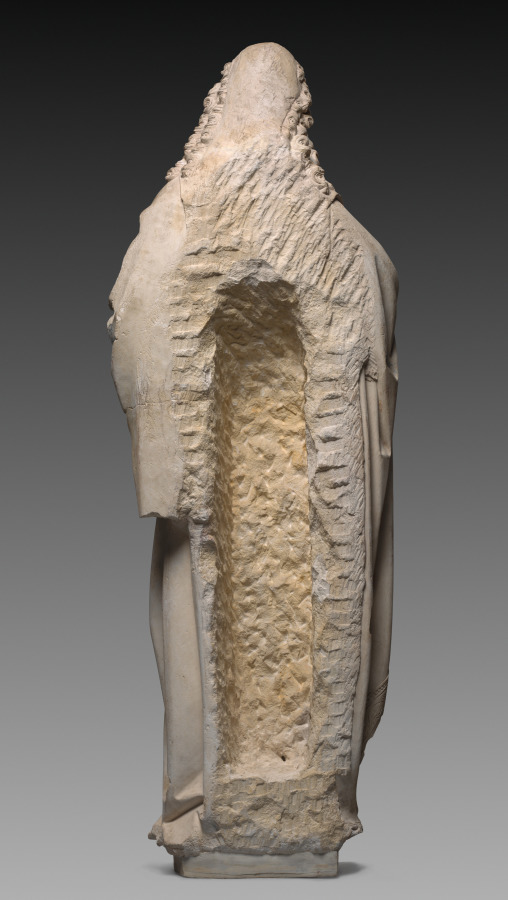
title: Saint John the Baptist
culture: French, Lorraine, Nancy or Bar-le-Duc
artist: attributed to Jan Crocq (Netherlandish, act. 1486–1510)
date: c. 1500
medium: Tonnerre limestone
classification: Sculpture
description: John the Baptist was one of the most beloved and widely venerated saints of the Middle Ages. He is depicted here wearing his traditional camel hair fleece beneath a luxuriant outer mantle. The sculpture is attributed to Jan Crocq, a Netherlandish artist active at the court of René II, Duke of Lorraine at Nancy from 1486 to 1510, and noted for his naturalistic treatment of hair and costume.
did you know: St. John the Baptist holds a book and a lamb, referencing his description of Christ as "the lamb of God."